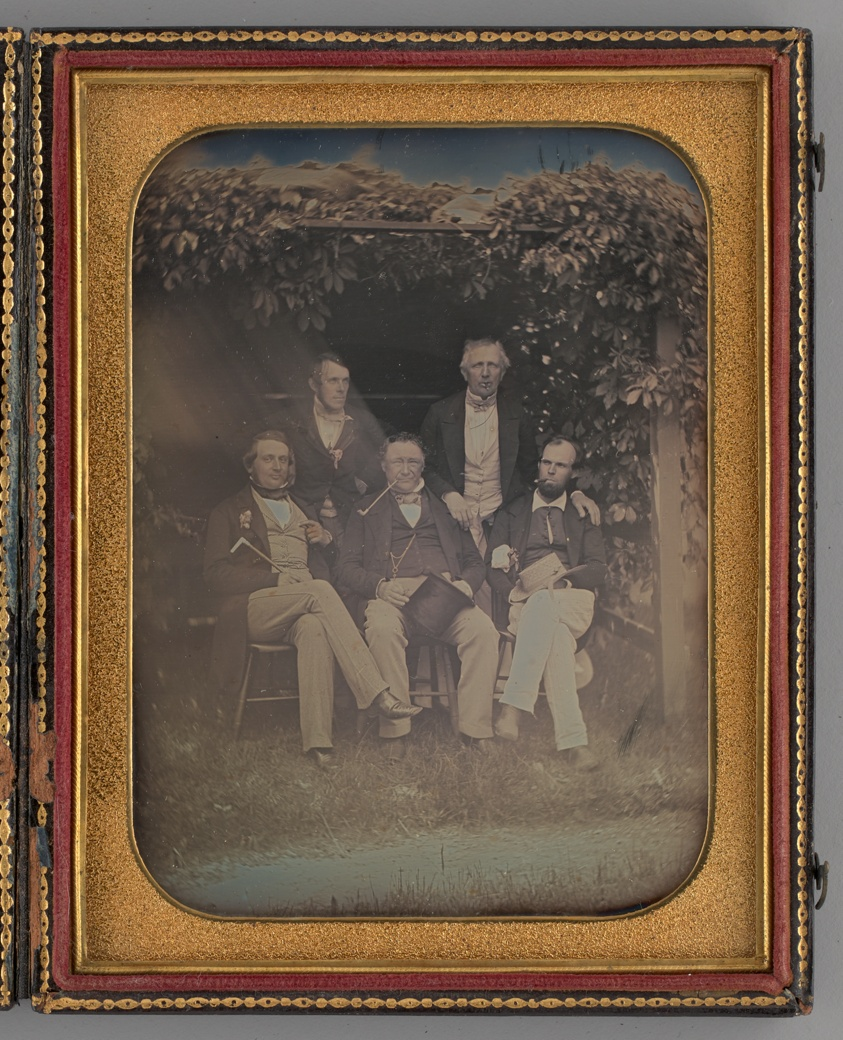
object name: Photograph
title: Untitled (Group Portrait of Five Men)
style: 19th century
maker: Unknown maker; American, 19th century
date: 1850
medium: Daguerreotype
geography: United States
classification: portrait; photograph; photographic process; photography; portrait; daguerreotype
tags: lundberg collection, portraits, portraits: male subject, portraits: multiple subjects